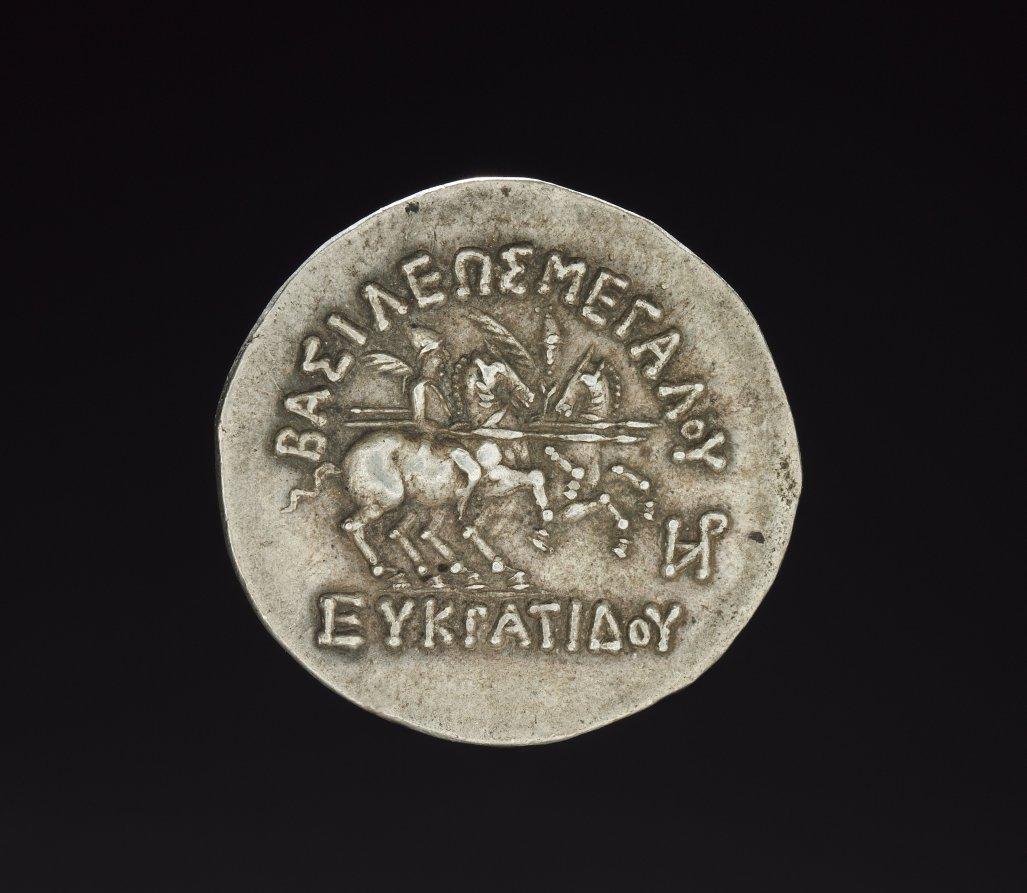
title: Coin of Eukratides I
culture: Afghanistan, Bactria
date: 170–145 BCE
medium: silver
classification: Silver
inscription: BASILEOS MEGALOU EUKRATIDOU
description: The twins Castor and Pollux were known as the Diosuroi in Greek mythology, and they were the children of Zeus and Leda. Together they also form the constellation Gemini. They frequently appeared on the reverse sides of Greek coinage, riding horses and holding spears, as they do on this Indo-Greek coin from the Hellenistic kingdom of Bactria.